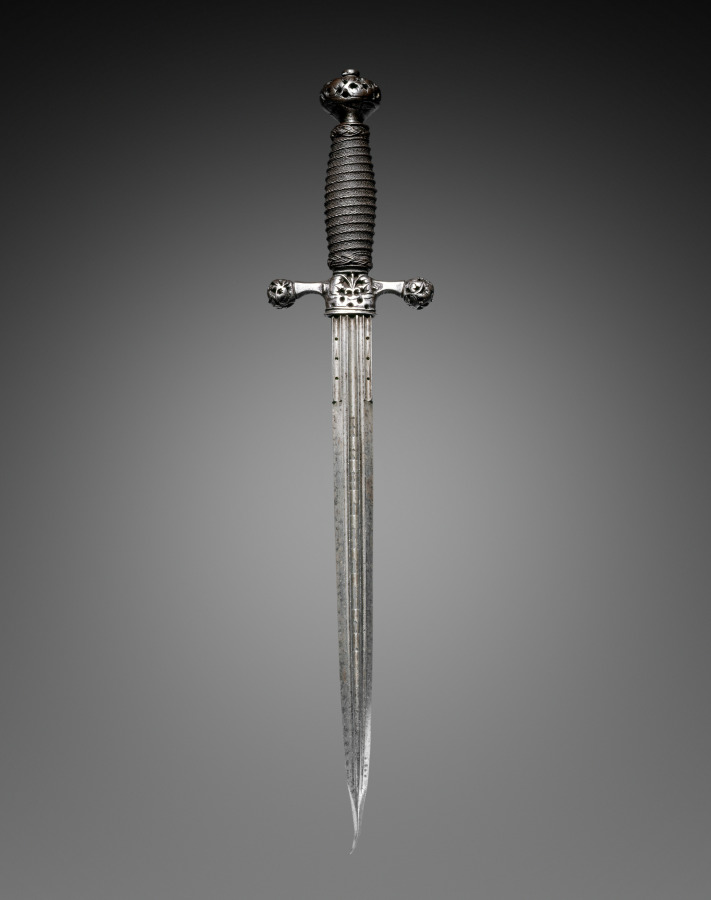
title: Dagger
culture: Netherlands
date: c. 1620–50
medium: steel, wire grip, perforated blade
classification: Arms and Armor